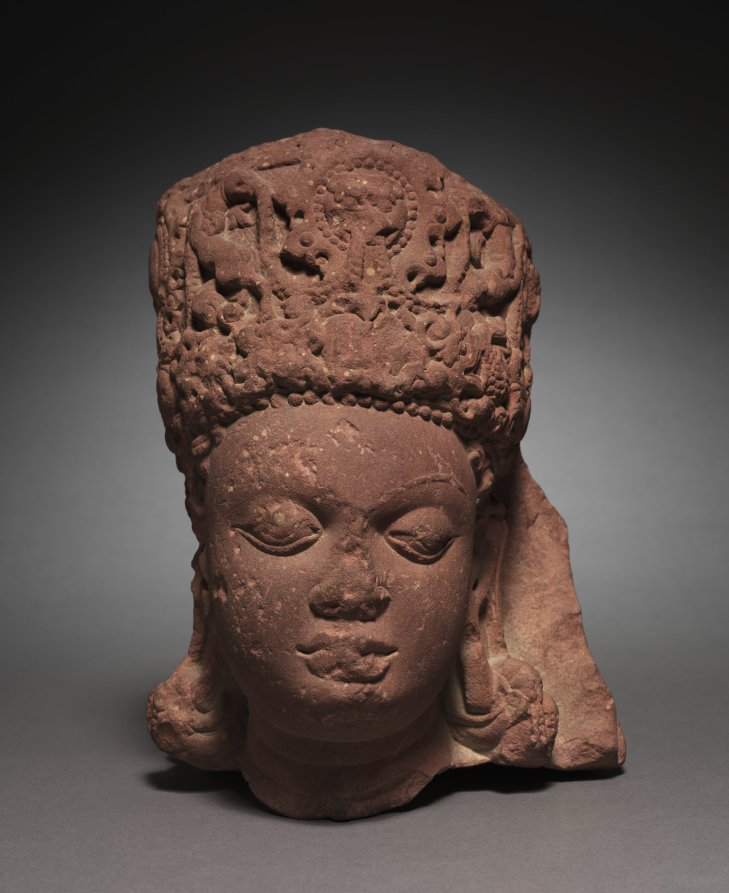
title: Head of Vishnu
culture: Northern India, Uttar Pradesh, Mathura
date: 400s CE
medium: sandstone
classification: Sculpture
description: During this period in India, the Hindu god Vishnu wears a distinctive squarish crown with a central medallion featuring a lion head. With strings of pearls issuing from his mouth, the imagery conveys the idea of radiance and glory. Devotees recognized Vishnu as having solar and royal attributes. His coiled ringlets of hair and heavy earrings also indicate that he was meant to have the appearance of a royal warrior.